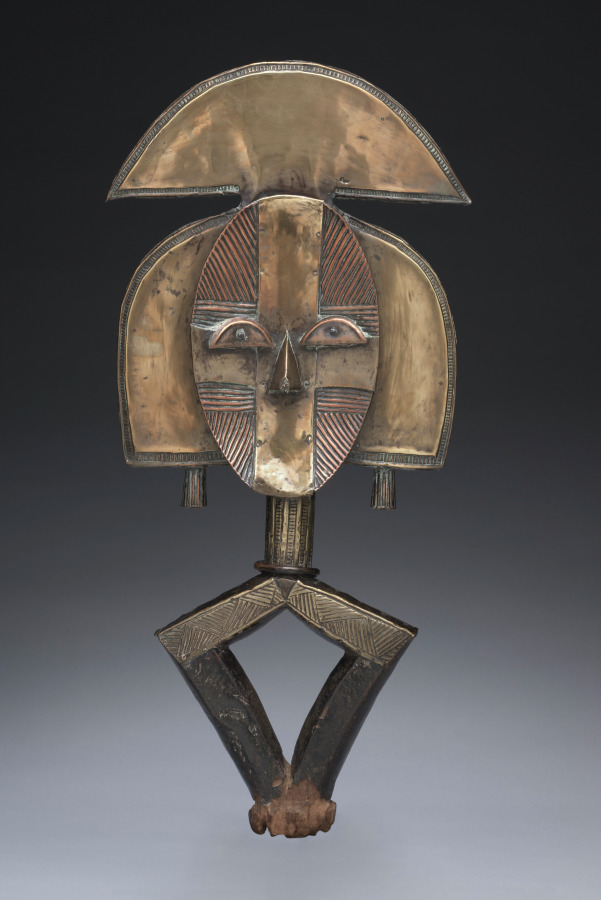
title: Sculptural Element from a Reliquary Ensemble (mbulu ngulu)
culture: Africa, Central Africa, Gabon, Kota-style maker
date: probably 1800s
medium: Wood, copper alloy, and iron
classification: Sculpture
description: The ethnic map of eastern Gabon is extremely complicated as a result of continuous migratory movements since the 17th century. Kota is the name of one of three culturally closely related people. All share the tradition of commemorating and honoring ancestors through the preservation and worship of sacred ancestral relics within cylindrical bark containers or bound in fiber packets. Covered with sheets of copper and brass, this abstract wooden human-shaped figure—distilled to a planar surface—served as a guardian set atop a basket container holding the skull, certain bones, and other relics of a deceased man. It belonged to a religious institution that honored the memory of individuals who made major contributions during their lifetime. The luminosity of the copper and brass covering was considered intimidating and spiritually empowered to deflect harm and thus protect the owner and his family.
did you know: The diamond-shaped "body" of this sculpture was originally pushed into a container of ancestral relics (bones) up to its "shoulders." Metal covers only areas of the wood that were left visible.